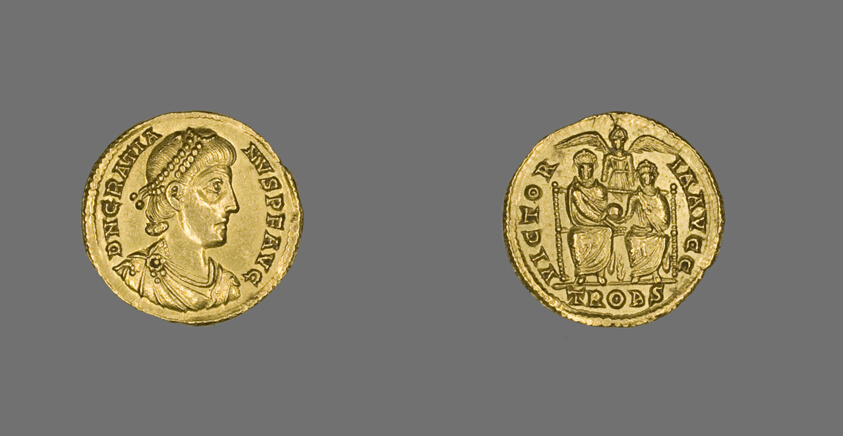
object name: Coin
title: Solidus (Coin) Portraying Emperor Gratian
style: roman (ancient, style or period)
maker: Roman, minted in Trier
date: 375-378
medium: Gold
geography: Trier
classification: coin; ancient art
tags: portrait